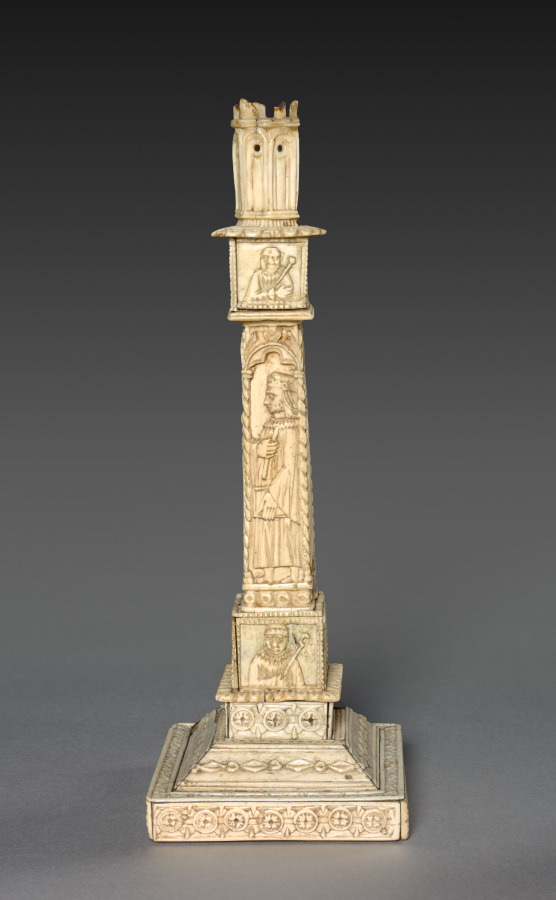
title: Candlestick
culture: Italy, 15th century style (possibly 19th-early 20th century)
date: 1800s - early 1900s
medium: ivory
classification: Ivory